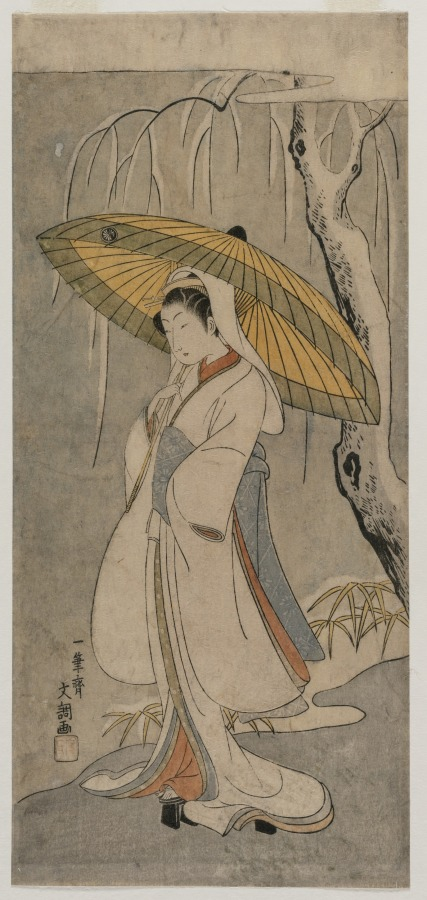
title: Segawa Kikunojo II as the Heron Maiden (from the series Ichimura Theater)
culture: Japan, Edo period (1615–1868)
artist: Ippitsusai Bunchō (Japanese, active c. 1765–92)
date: 1770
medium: color woodblock print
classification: Print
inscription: Signature: Ippitsusai Buncho ga. Artist Seal: Mori uji.